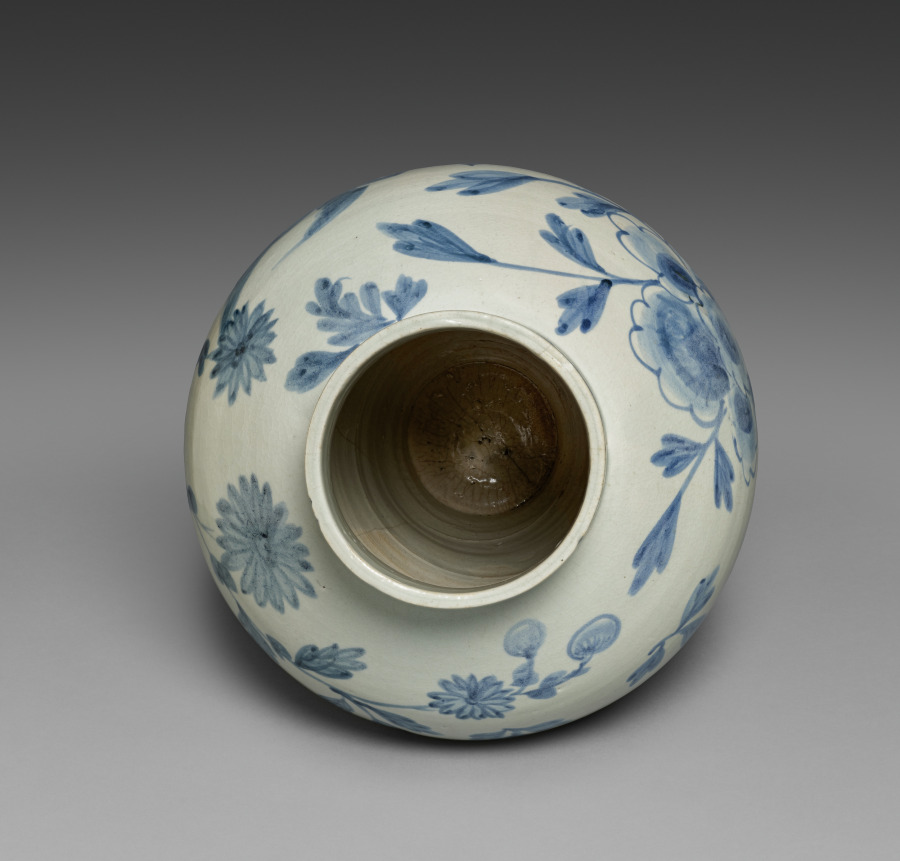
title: Vase with Bird and Flower Design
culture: Korea, Joseon dynasty (1392–1910)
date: late 1800s–early 1900s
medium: porcelain with underglaze blue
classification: Ceramic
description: This vase with broad shoulders and a tall neck represents a typical style of 19th-century blue-and-white porcelain. Unlike earlier examples decorated mainly with literati themes that evoke neo-Confucian moral values—plum blossoms (purity), orchids (grace), bamboo (integrity), and chrysanthemums (loftiness)—porcelain works of the 1800s feature fully bloomed peonies and a pair of playful birds, symbols of wealth and familial harmony.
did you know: Nineteenth-century Korean blue-and-white porcelains tend to feature broad shoulders and a tall neck.